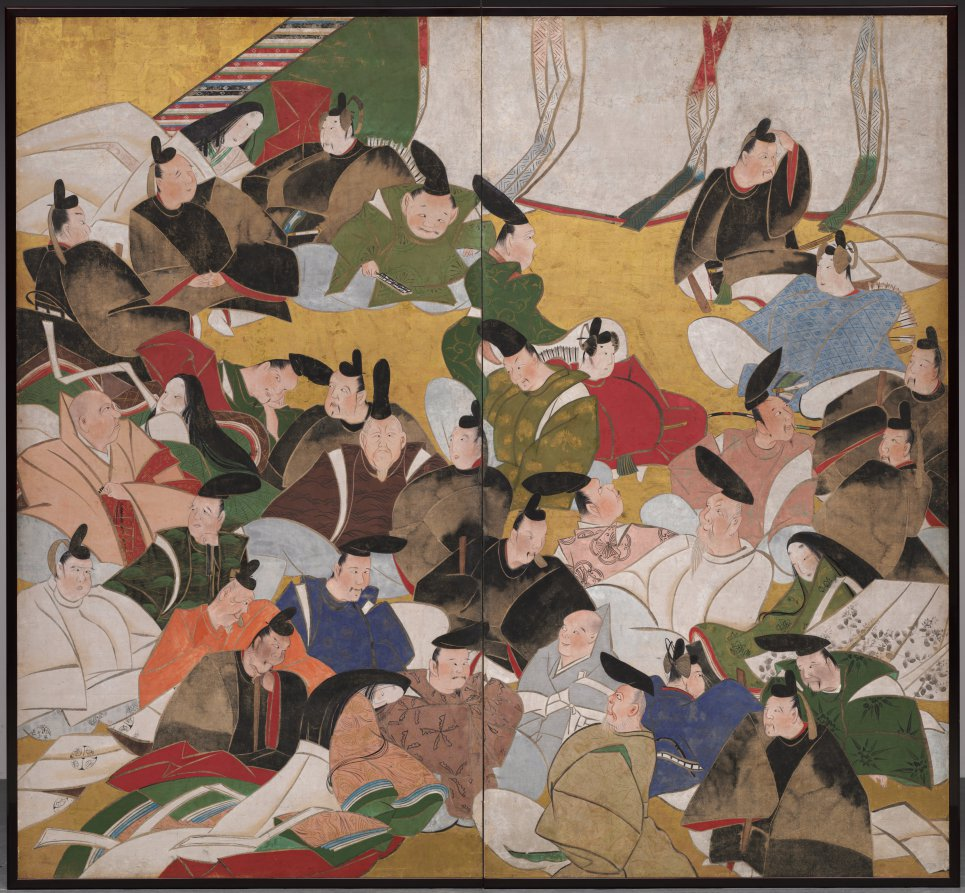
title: Thirty-Six Poetic Immortals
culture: Japan, Edo period (1615–1868)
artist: attributed to Tatebayashi Kagei (Japanese, active mid-1700s)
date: mid 1700s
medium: two-fold screen; ink, color, and gold on paper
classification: Painting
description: Fujiwara no Kintō (996–1075), a Japanese courtier, scholar, and poet, compiled select examples by the most celebrated composers of 31-syllable poems (waka) from the 600s to the 1000s. Painters soon made these “thirty-six poetic immortals” a favorite subject, traditionally presenting the poets in sequential, idealized portraits paired with their poems. In this interpretation, a chronologically impossible gathering of these great talents is in progress. The screen’s composition follows one devised by design virtuoso Ogata Kōrin (1658–1716).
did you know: The green surface edged with stripes at the upper left of the painting represents tatami matting with a silk border.